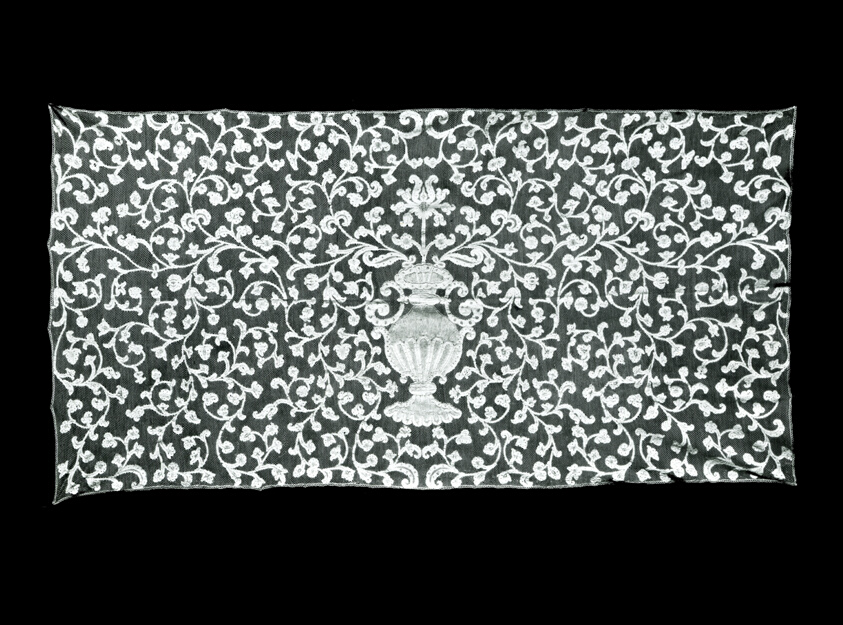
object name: Religious/Ritual Object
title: Altar Frontal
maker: Northern Italy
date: 1725/50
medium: Linen, bobbin part lace (worked in large sections with the aid of a hook)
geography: Northern Italy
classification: textile; lace - bobbin; ritual objects